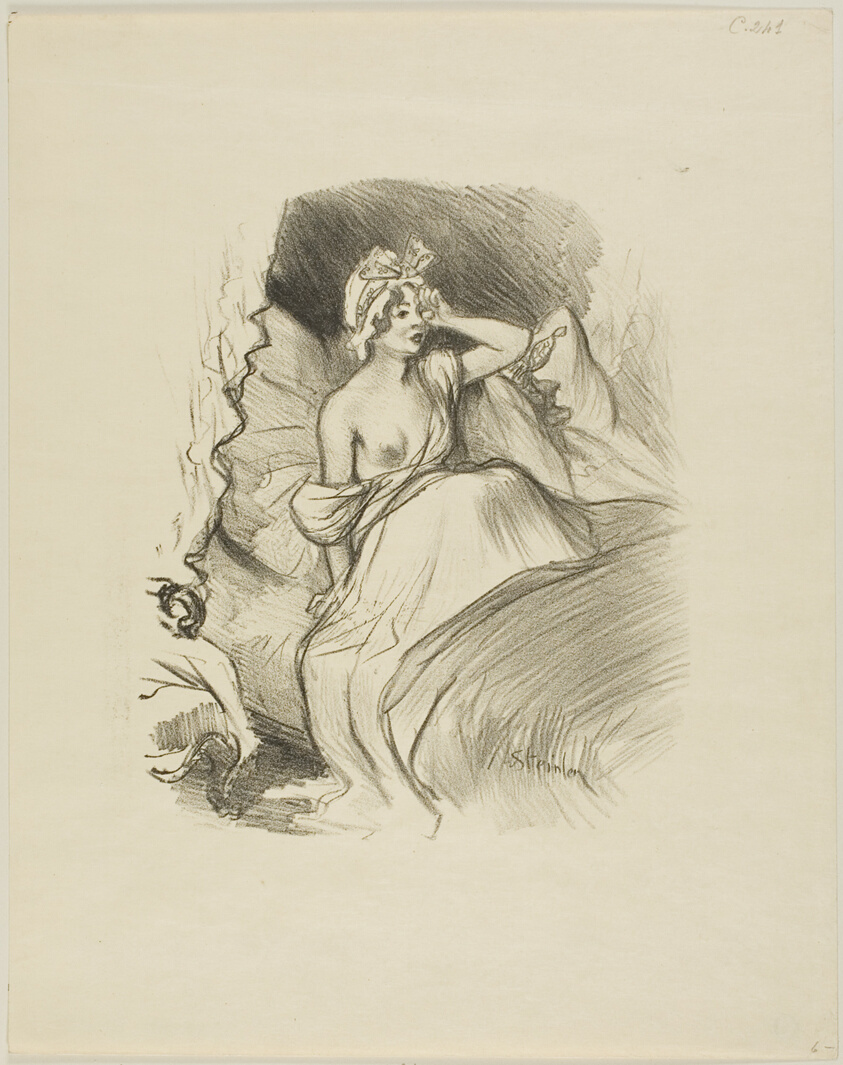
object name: Print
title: Little Rosette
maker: Théophile-Alexandre Steinlen; French, born Switzerland, 1859-1923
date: June 1900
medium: Lithograph in black on cream wove paper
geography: France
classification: lithograph; print; prints and drawing